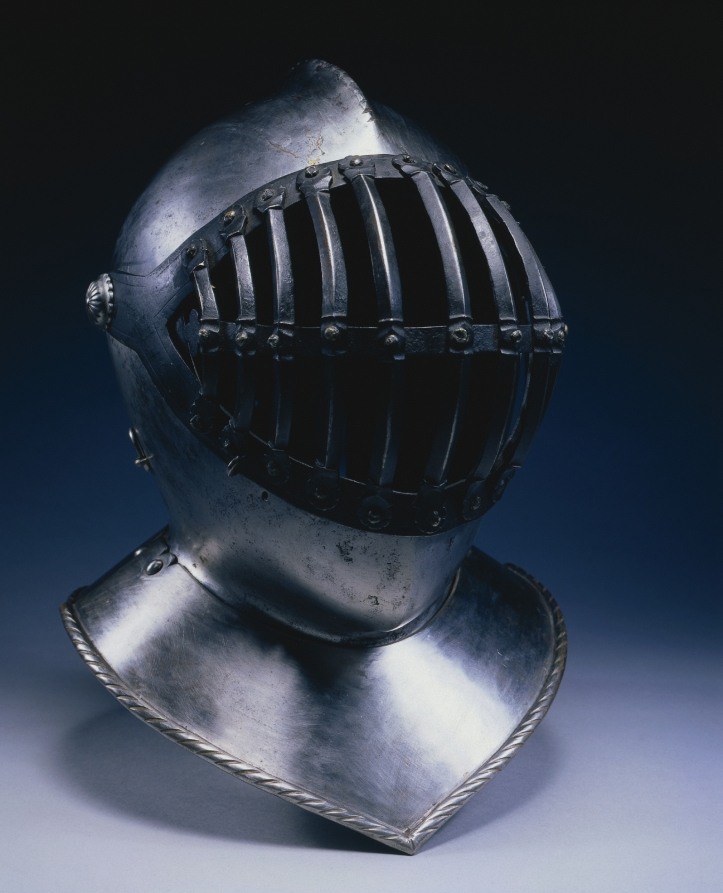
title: Helmet with Barred Visor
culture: England (?), 16th century (visor and neck lames modern, by S.J. Whawell)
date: 1500s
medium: steel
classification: Arms and Armor